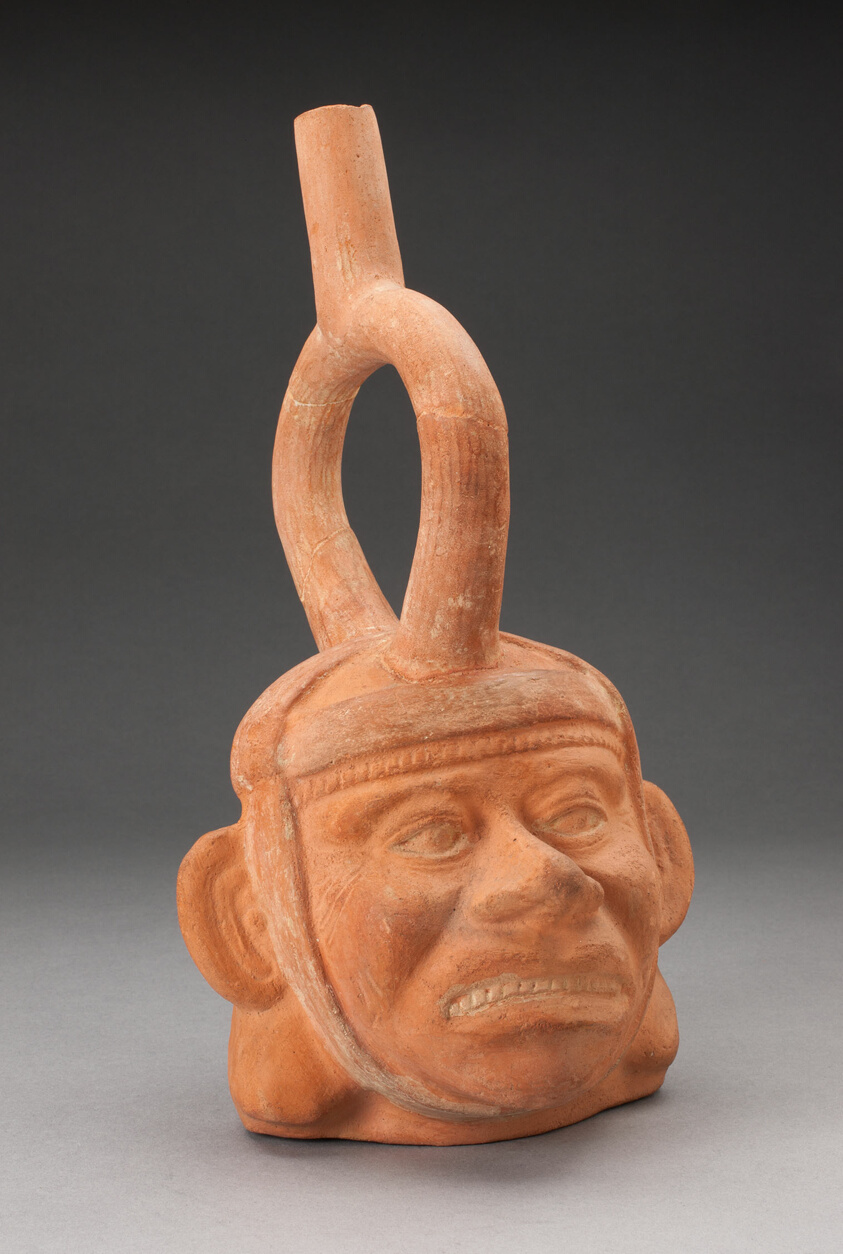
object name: Vessel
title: Portrait Vessel of a Figure with Grimacing Face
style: moche, Arts of the Americas, andes, south american, andean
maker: Moche (Chimbote, Santa Valley, north coast, Peru)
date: 100 BCE–500 CE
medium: Ceramic and pigment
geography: Peruvian North Coast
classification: earthenware; ceramics; vessel; art of the americas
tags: people, portraits